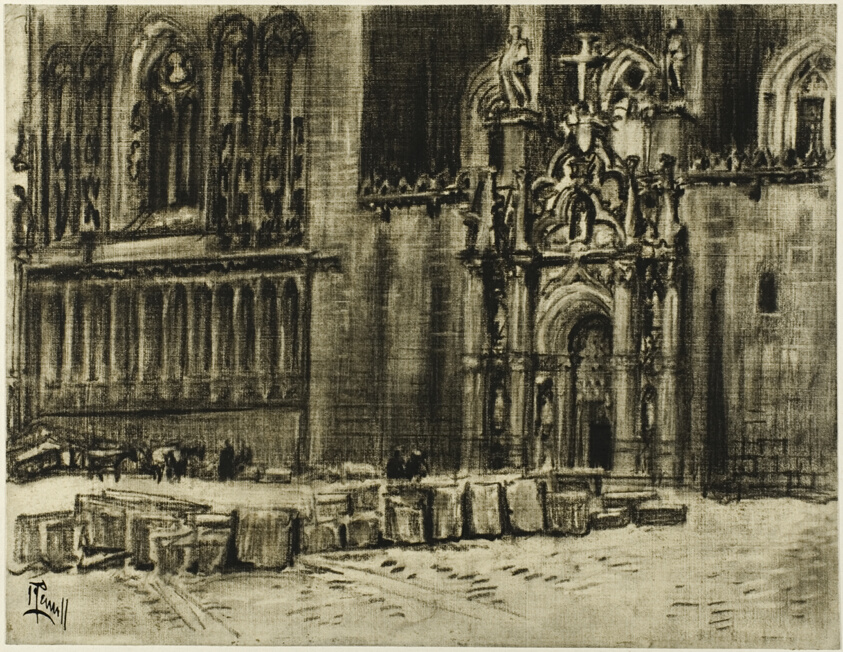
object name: Drawing and Watercolor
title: St. Juan de los Reyes, the Door and the Chains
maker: Joseph Pennell (American, 1857-1926)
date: c. 1903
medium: Oiled charcoal with stumping and erasing, on cream wove paper, perimeter mounted on off-white wood pulp laminate board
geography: United States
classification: charcoal; drawings (visual works); prints and drawing